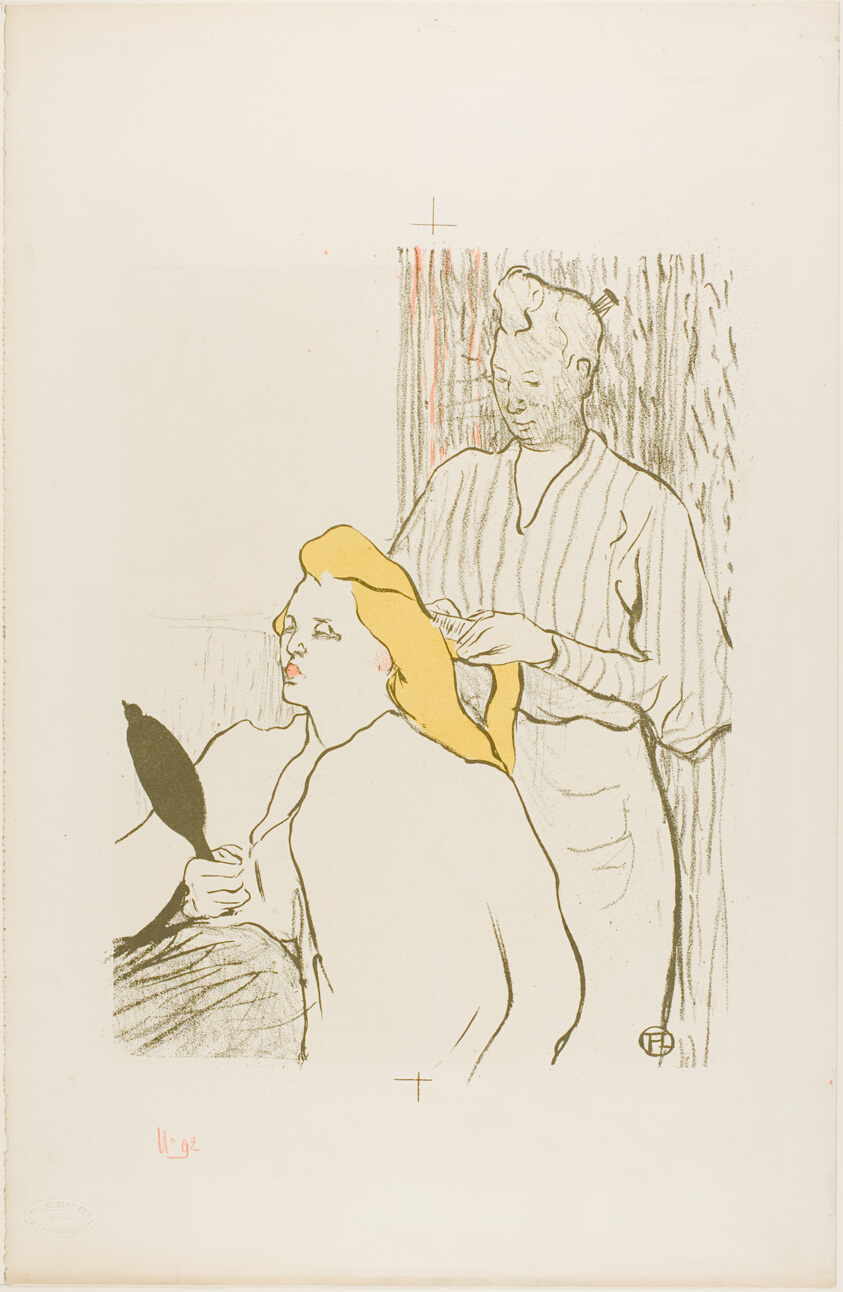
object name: Print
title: The Hairdresser, Program for the Théâtre Libre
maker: Henri de Toulouse-Lautrec (French, 1864-1901)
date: 1893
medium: Color lithograph on cream wove paper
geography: France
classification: lithograph; print; prints and drawing